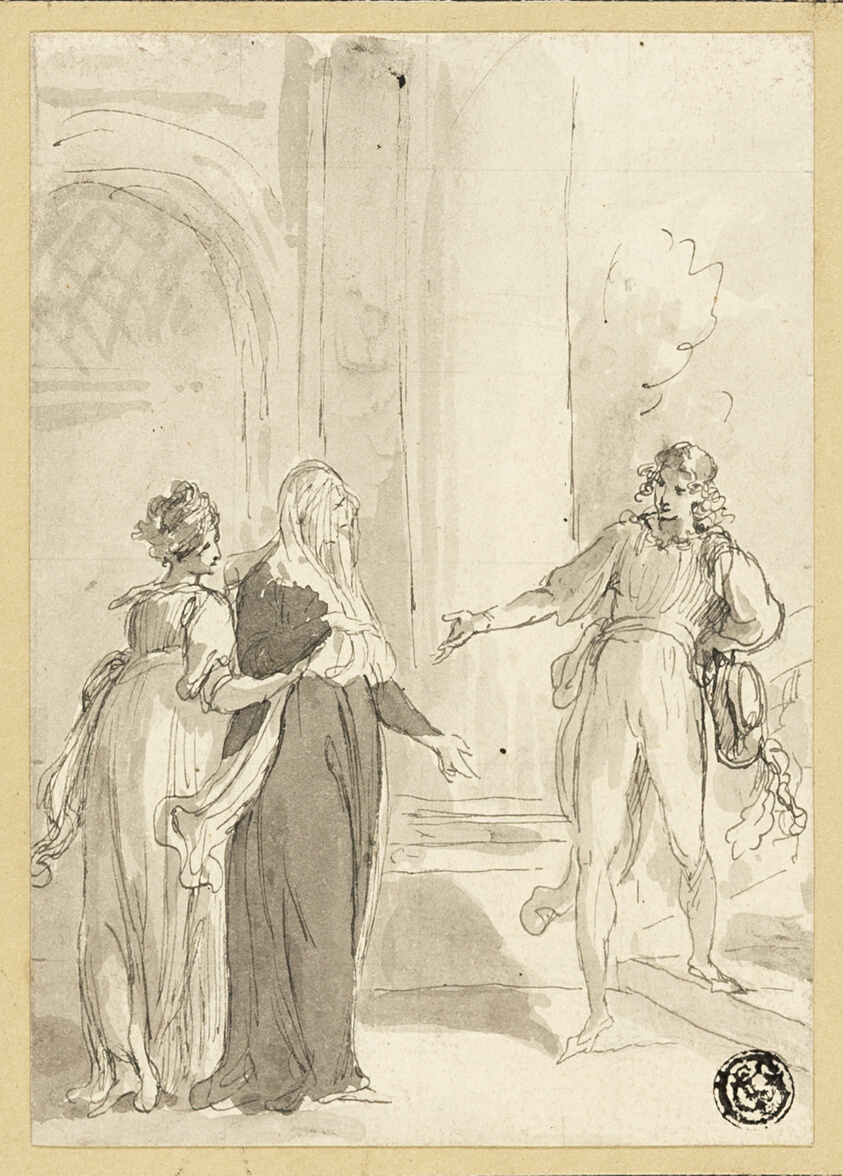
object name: Drawing and Watercolor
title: Study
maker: William Hamilton (English, 1751-1801)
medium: Pen and gray ink, with brush and gray wash, on ivory laid paper, laid down on card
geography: England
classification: ink or chalk wash; drawings (visual works); prints and drawing